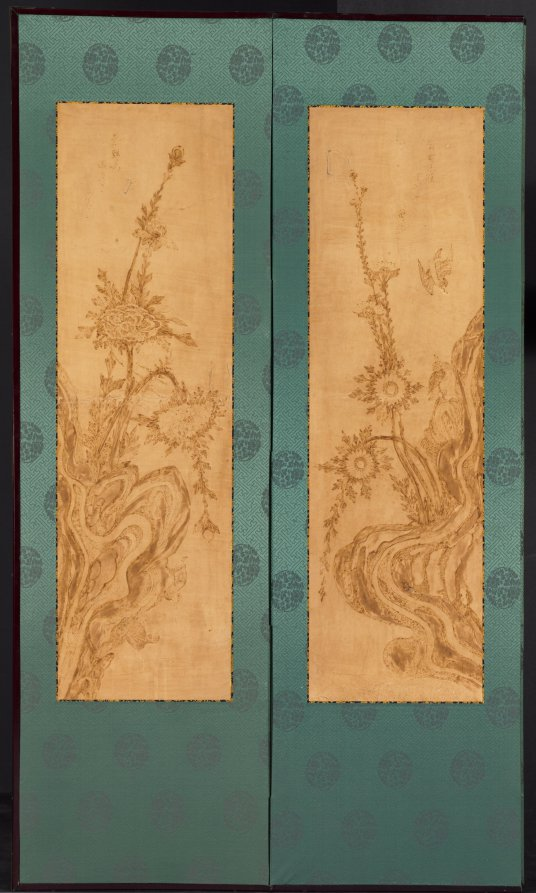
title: Birds and Flowers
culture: Korea, Joseon dynasty (1392–1910)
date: late 1800s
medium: Ten-panel folding screen with designs and inscriptions burnt into paper (pyrography)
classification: Painting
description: The image depicted on this folding screen is not executed in ink, but rather a method called “pyrography" or "nakhwa,” a technique of burning the surface of materials ranging from wood to paper with the delicately controlled application of a heated metal tool. This technique became widely popular in the 19th century. Scorched marks here replace brush strokes. Nakhwa method is now designated as a Korean Intangible Cultural Asset by the Korean government.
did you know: The painting is done by a pyrography method, a technique of burning the surface of materials with a heated tool.